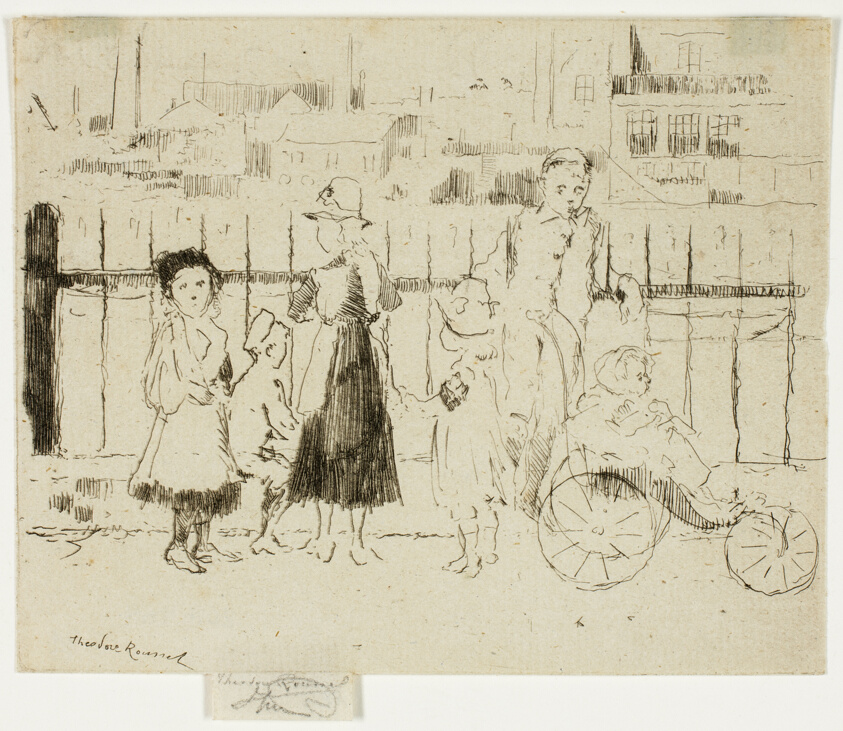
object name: Print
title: Events Over the Railings, Chelsea Embankment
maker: Theodore Roussel (French, worked in England, 1847-1926)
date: 1888–89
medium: Etching in black on ivory laid paper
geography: England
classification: etching; paper; print; prints and drawing